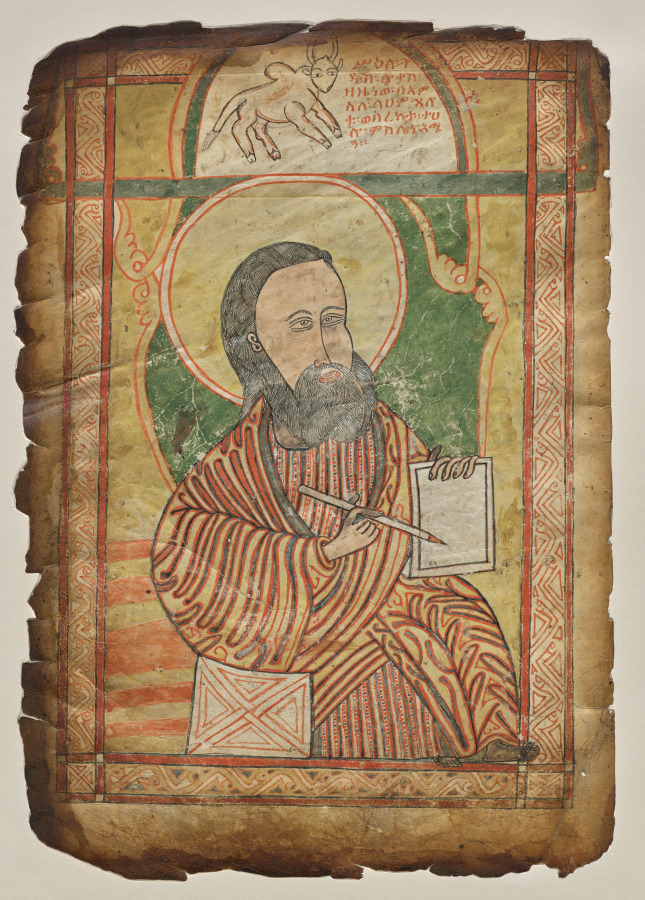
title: Single Leaf from a Gospel Book with a Portrait of Saint Luke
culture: Empire of Ethiopia, Tigray region (Ethiopia)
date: c. 1440–80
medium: ink and tempera on vellum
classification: Manuscript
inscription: ሥእለ ፡ ቅዱስ ፡ ሉቃስ ፡ ዘዜነወ ፡ ባአምስለ ፡ ላሀም ፡ ጸሎቱ ፡ ወበረከቱ። ተሀሉ ፡ ምስሌነ፡ አሜን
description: Christianity arrived in Ethiopia during the 300s CE, well before reaching northern Europe. Typical of panel and manuscript painting in Ethiopia, this leaf is decorated with bright colors and a joyous interplay of geometric pattern. The full-page miniature depicts the evangelist Luke, with his symbol, the ox, within the arch above. The short text is in the Ge‘ez (the centuries-old church language of Ethiopian Orthodoxy) and consists of the opening lines of the gospel of Luke: “Make this image of St. Luke with this bull––his prayer (offering)––and with his blessings, they were with us. Amen.”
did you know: The majority of Ethiopian manuscripts are written in Ge’ez, the ancient liturgical language of Ethiopia.